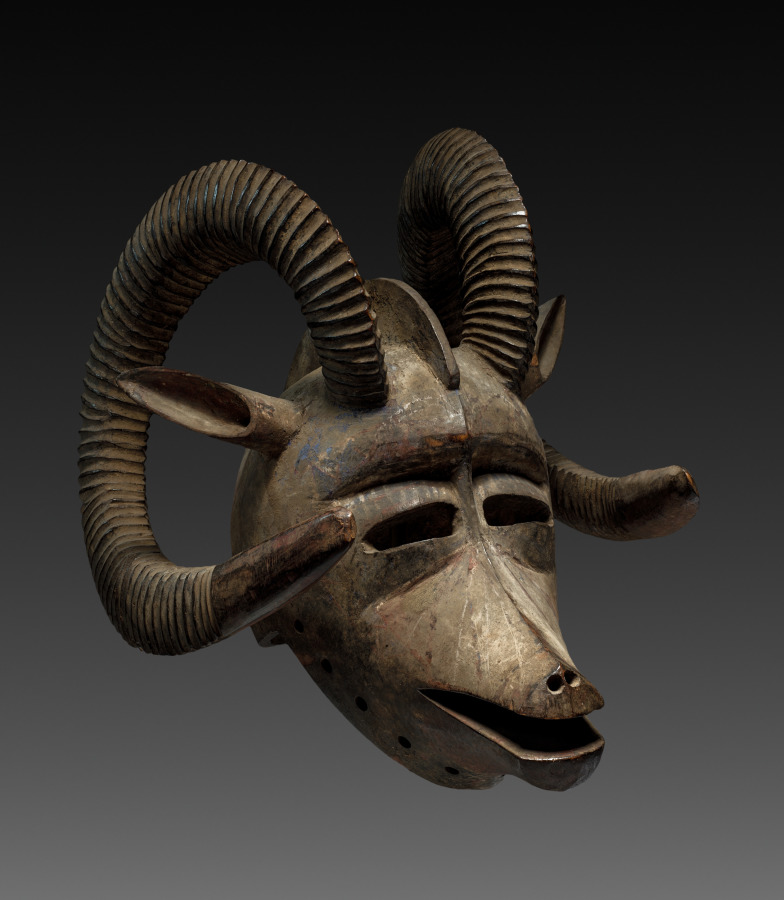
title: Ram Mask (Bolo)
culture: Africa, West Africa, Burkina Faso, Bobo-style blacksmith-carver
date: possibly early 1900s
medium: Wood and paint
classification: Mask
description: Bolo masks are primarily danced for entertainment during communal occasions like funerals, male initiations, and harvest celebrations. Comprising both animal and human features, the mask––always worn by a male dancer––refers to the cultural significance of the ram, an animal associated with male aggression across sub-Saharan Africa.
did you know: The mask was vividly painted while in use. Look closely at its surface to see traces of blue, red, and white paint.